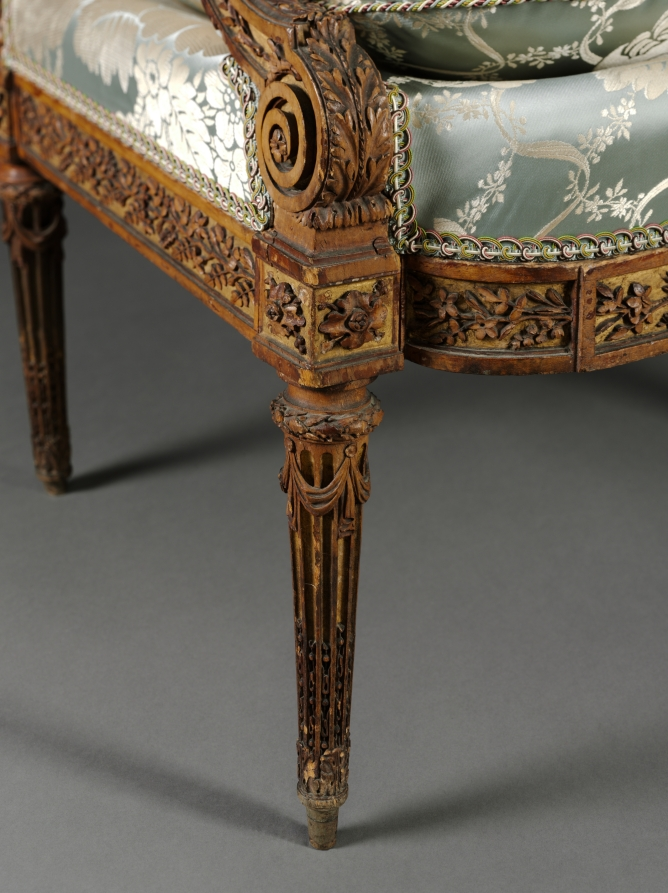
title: Armchair (Fauteuil) (1 of 2)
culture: France, 18th century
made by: Nicolas-Denis Delaisement (French)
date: c. 1785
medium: boxwood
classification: Furniture and woodwork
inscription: signed on back of frame of seat underneath: Delaisement with inverted "s."